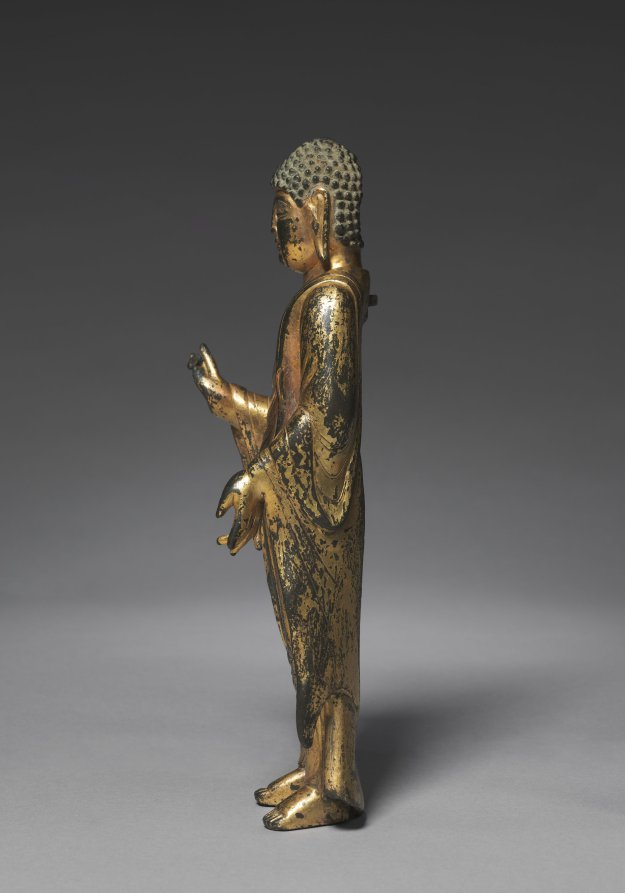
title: Standing Amitabha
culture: Korea, Unified Silla period (676-935)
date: 800s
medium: gilt bronze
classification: Sculpture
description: Buddhist teachings emphasize the pursuit of spirituality, rather than physicality, to achieve enlightenment. This statue’s artist, however, made genuine efforts to represent the divine’s beautiful voluminous body. Inspired by Indian Gupta period art (300s–500s CE), this particular artistic style emphasizing soft modeling and naturalism was further developed in China and flourished across East Asia.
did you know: This Korean statue has a stylistic affinity with statues from the Indian Gupta period (300s–500s CE) that emphasize soft modeling and naturalism.